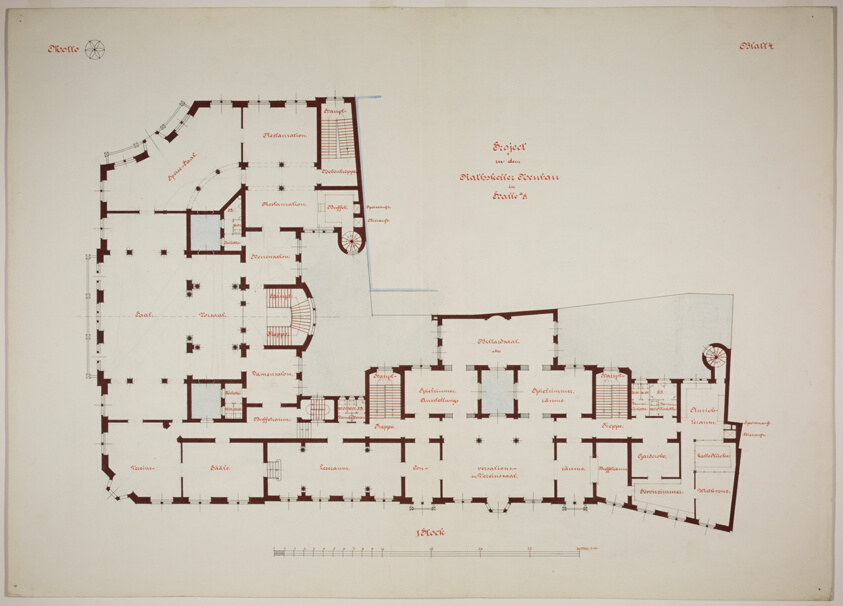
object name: Architectural Drawing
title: Rathskeller Neubau, Halle (Saale), Saxony-Anhalt, Germany, First Floor Plan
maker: Peter J. Weber; American, born Germany, 1863-1923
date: c. 1887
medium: Graphite, ink, watercolor, and tempera on paper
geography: Saxony-Anhalt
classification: design drawing; architectural drawing